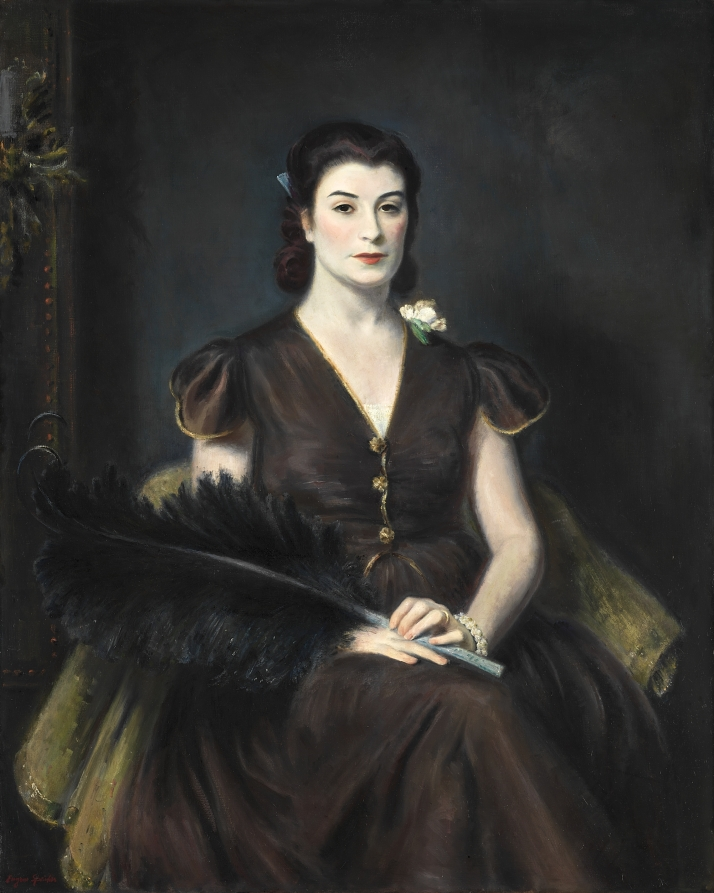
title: Jeanne Balzac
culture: America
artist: Eugene Speicher (American, 1883–1962)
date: 1923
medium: oil on canvas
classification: Painting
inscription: signed lower left: Eugene Speicher